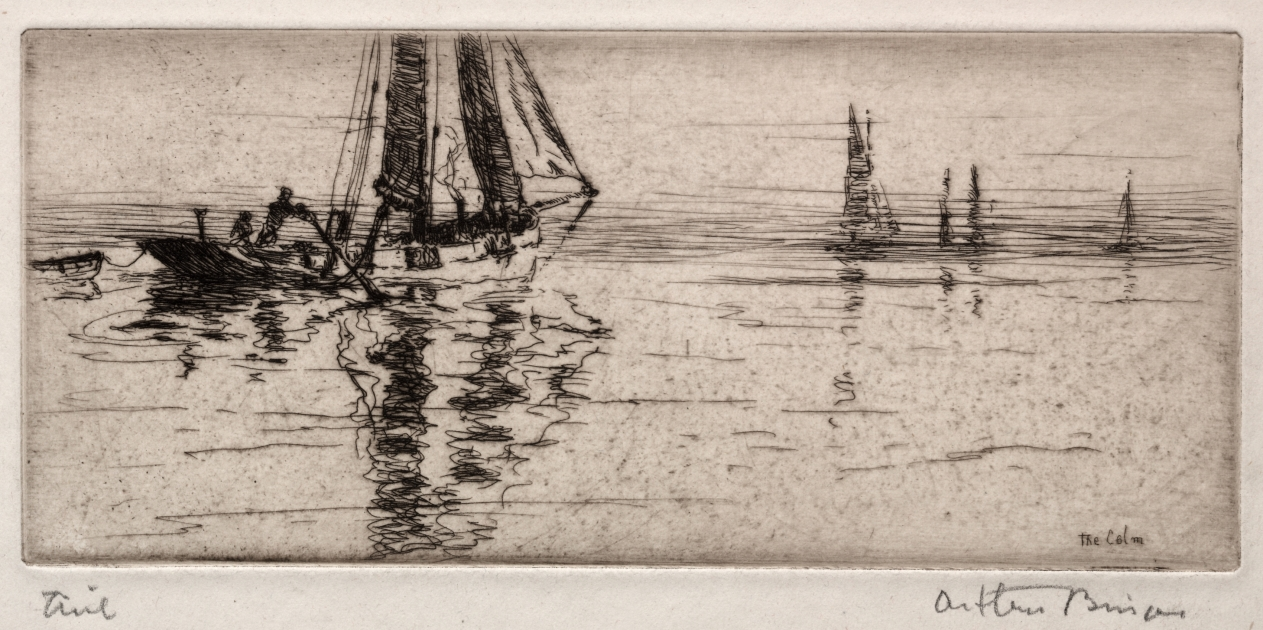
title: The Calm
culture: England, 20th century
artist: Arthur John Trevor Briscoe (British, 1873–1943)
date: 1925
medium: etching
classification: Print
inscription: Lower margin, in graphite: trial Arthur Briscoe